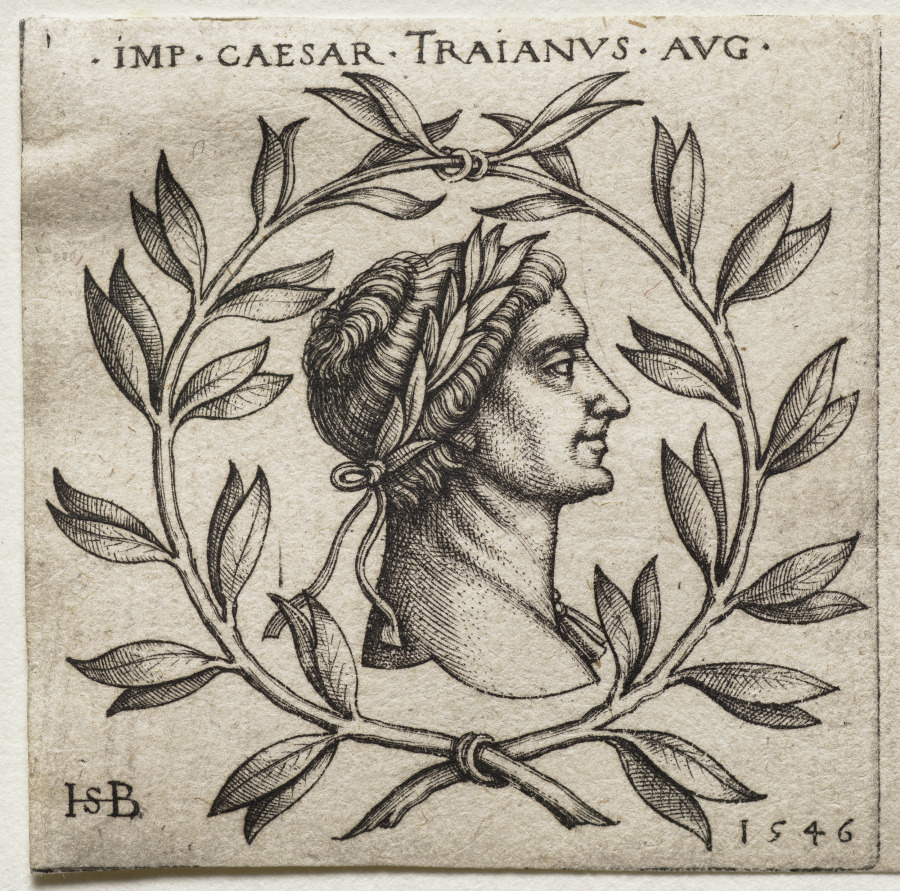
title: Bust of Emperor Trajan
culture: Germany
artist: Hans Sebald Beham (German, 1500–1550)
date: 1546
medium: engraving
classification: Print